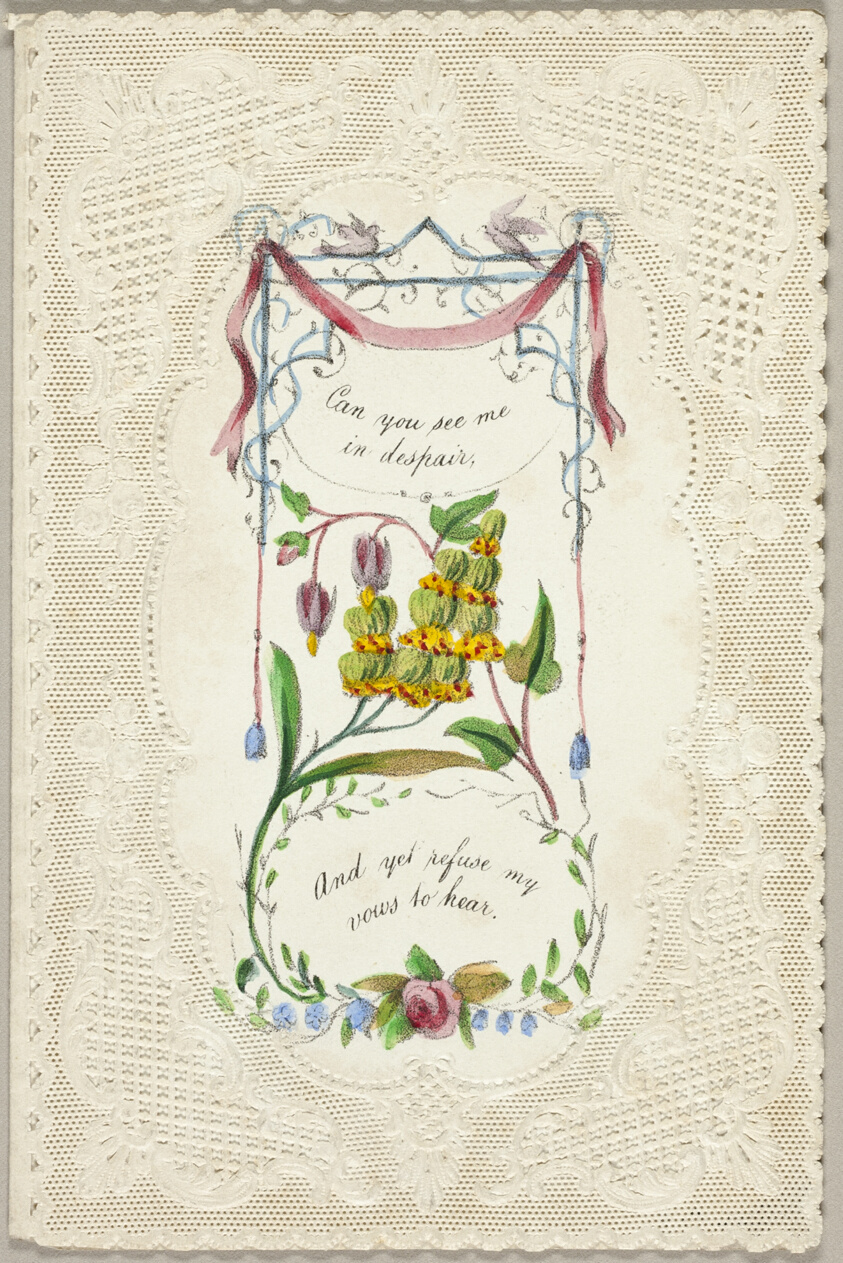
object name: Print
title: Can You See Me in Despair? (Valentine)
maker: George Meek (English, 19th century)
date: c. 1840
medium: Lithograph with hand-coloring on cut and embossed ivory wove paper (lace)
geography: England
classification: valentine; prints and drawing; print